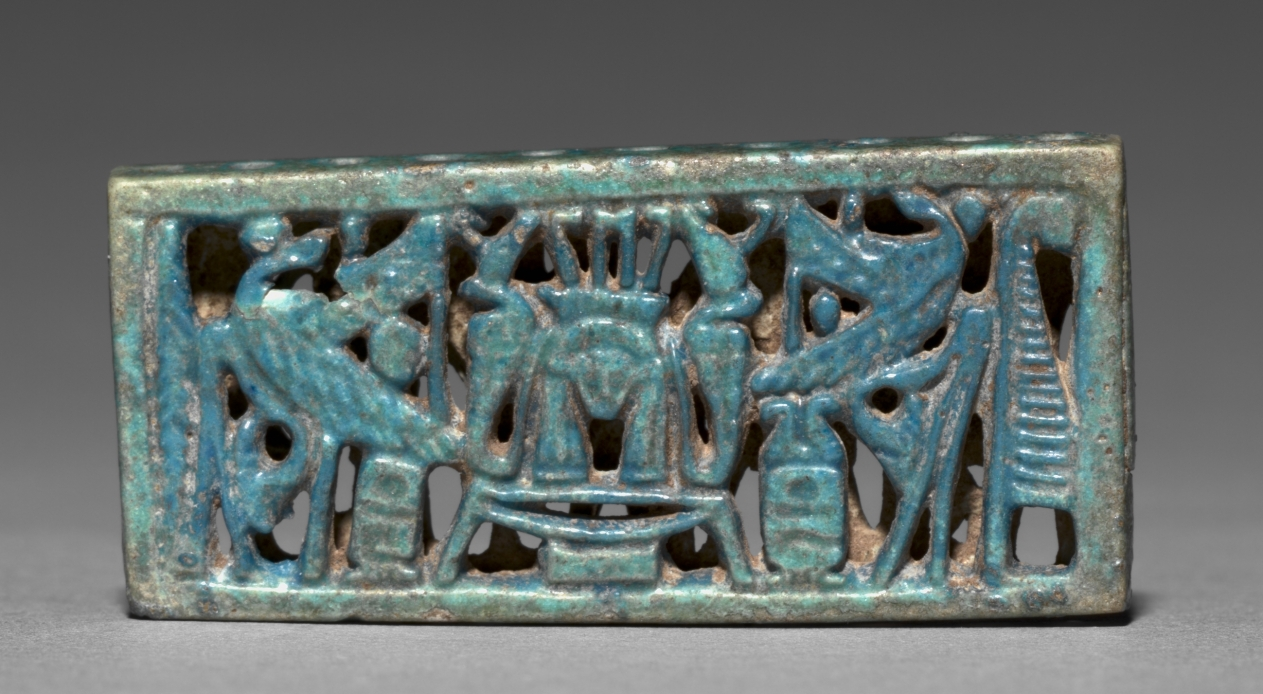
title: Openwork Spacer Bead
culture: Egypt, Third Intermediate (1069–715 BCE), Dynasties 21–22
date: 1069–715 BCE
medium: turquoise faience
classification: Jewelry